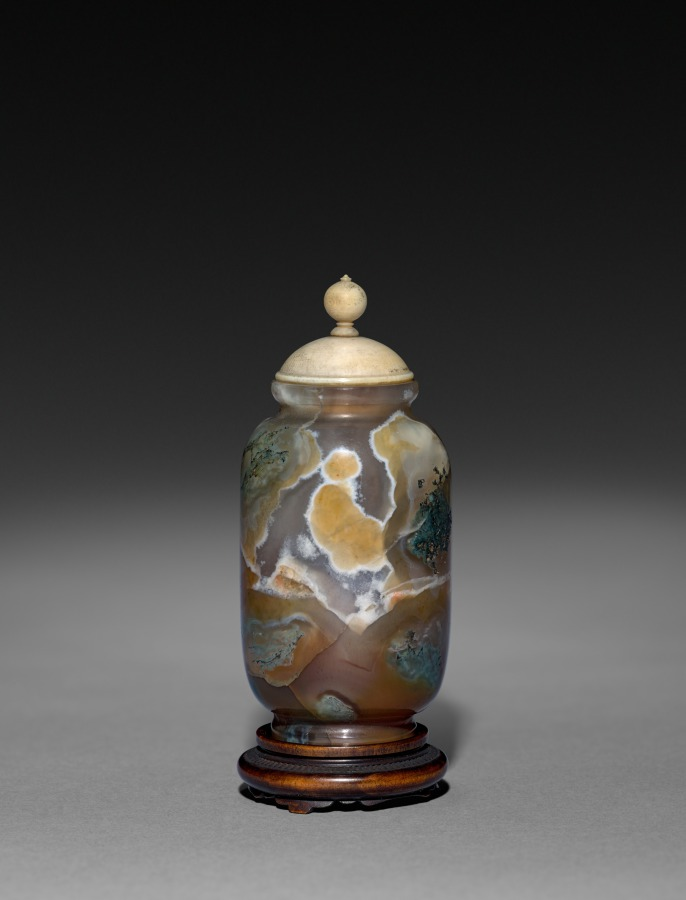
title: Snuff Bottle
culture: China, Qing dynasty (1644-1911)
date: 1644–1911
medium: glass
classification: Glass